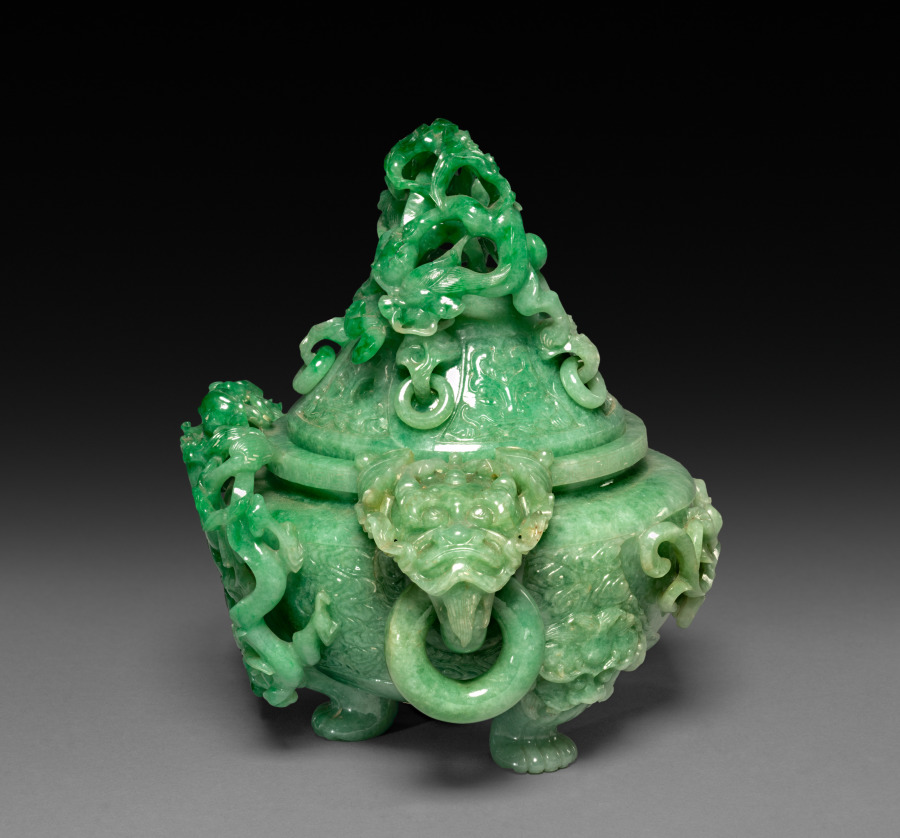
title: Three-Sectional Altar Group: Koro with Lid and Base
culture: China, Qing dynasty (1644-1911)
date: 1644–1911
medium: jade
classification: Jade